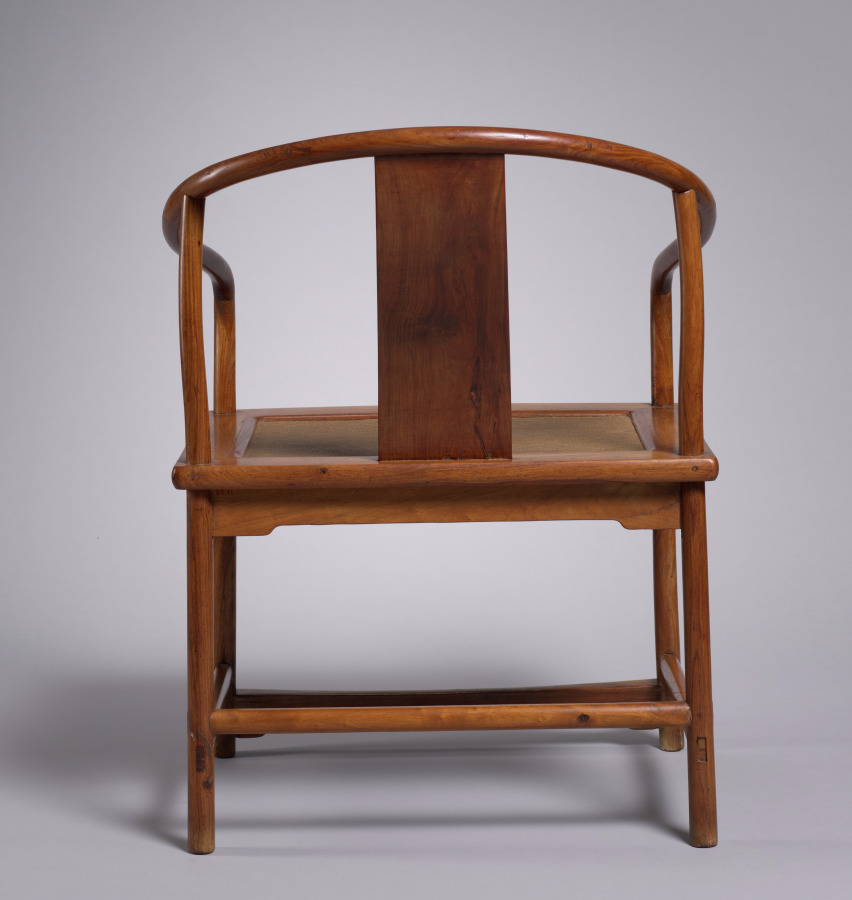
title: Roundback Armchair: Lohan Type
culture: China, Jiangsu province, Ming dynasty (1368–1644) or Qing dynasty (1644–1911)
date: 1600s–1700s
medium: Rosewood (huanghuali)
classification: Furniture and woodwork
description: In history, China moved from an original floor culture to high chairs and tables, developing a unique tradition of craftsmanship. Although still relatively unexplored, the manufacturing and styles of furniture differ by region. This horseshoe-back armchair was made in Jiangsu province. Its simplicity and minimalist elegance is characteristic of Suzhou-style furniture and aesthetics. The back of the chair is made of seven pieces of wood, joined and secured with an inserted wooden pin, a mortise-tenon technique that appeared in its earliest form in Neolithic fragments of the Hemudu culture.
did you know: Similar chairs with low, straight backs were presumably used by women or in a less formal context.